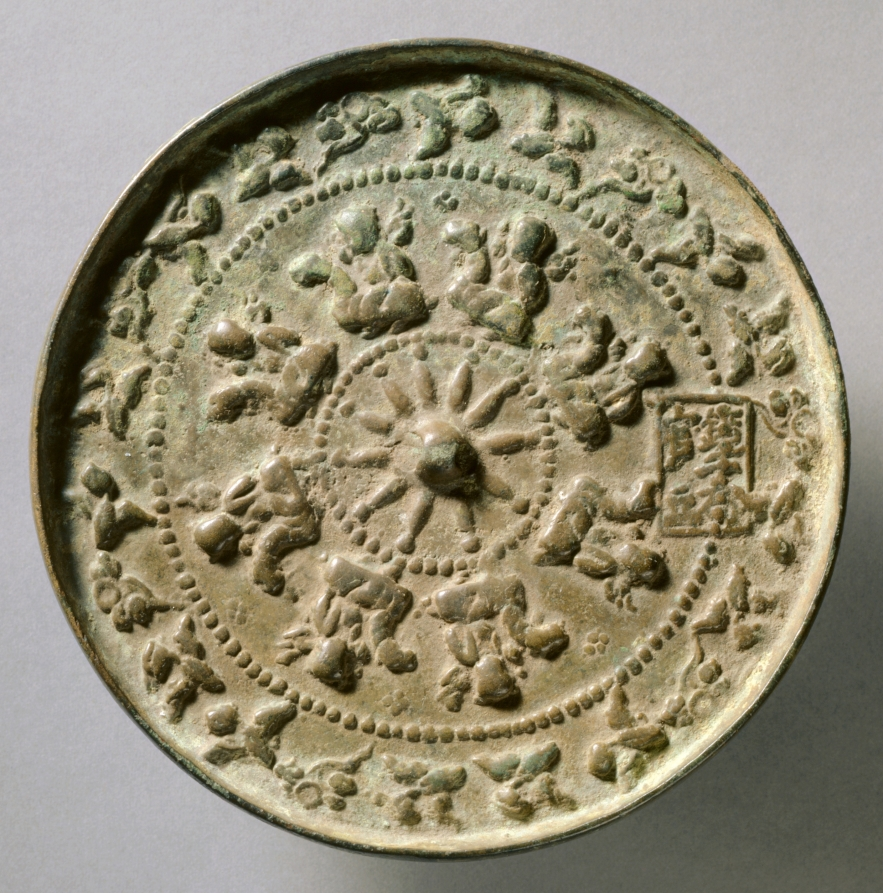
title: Mirror with Wheel Spokes and Riding Boys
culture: China, Jin dynasty (1115-1234)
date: c. 1196–1234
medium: bronze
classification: Metalwork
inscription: 官立鏡子局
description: Inscription: Official Bureau of Mirrors